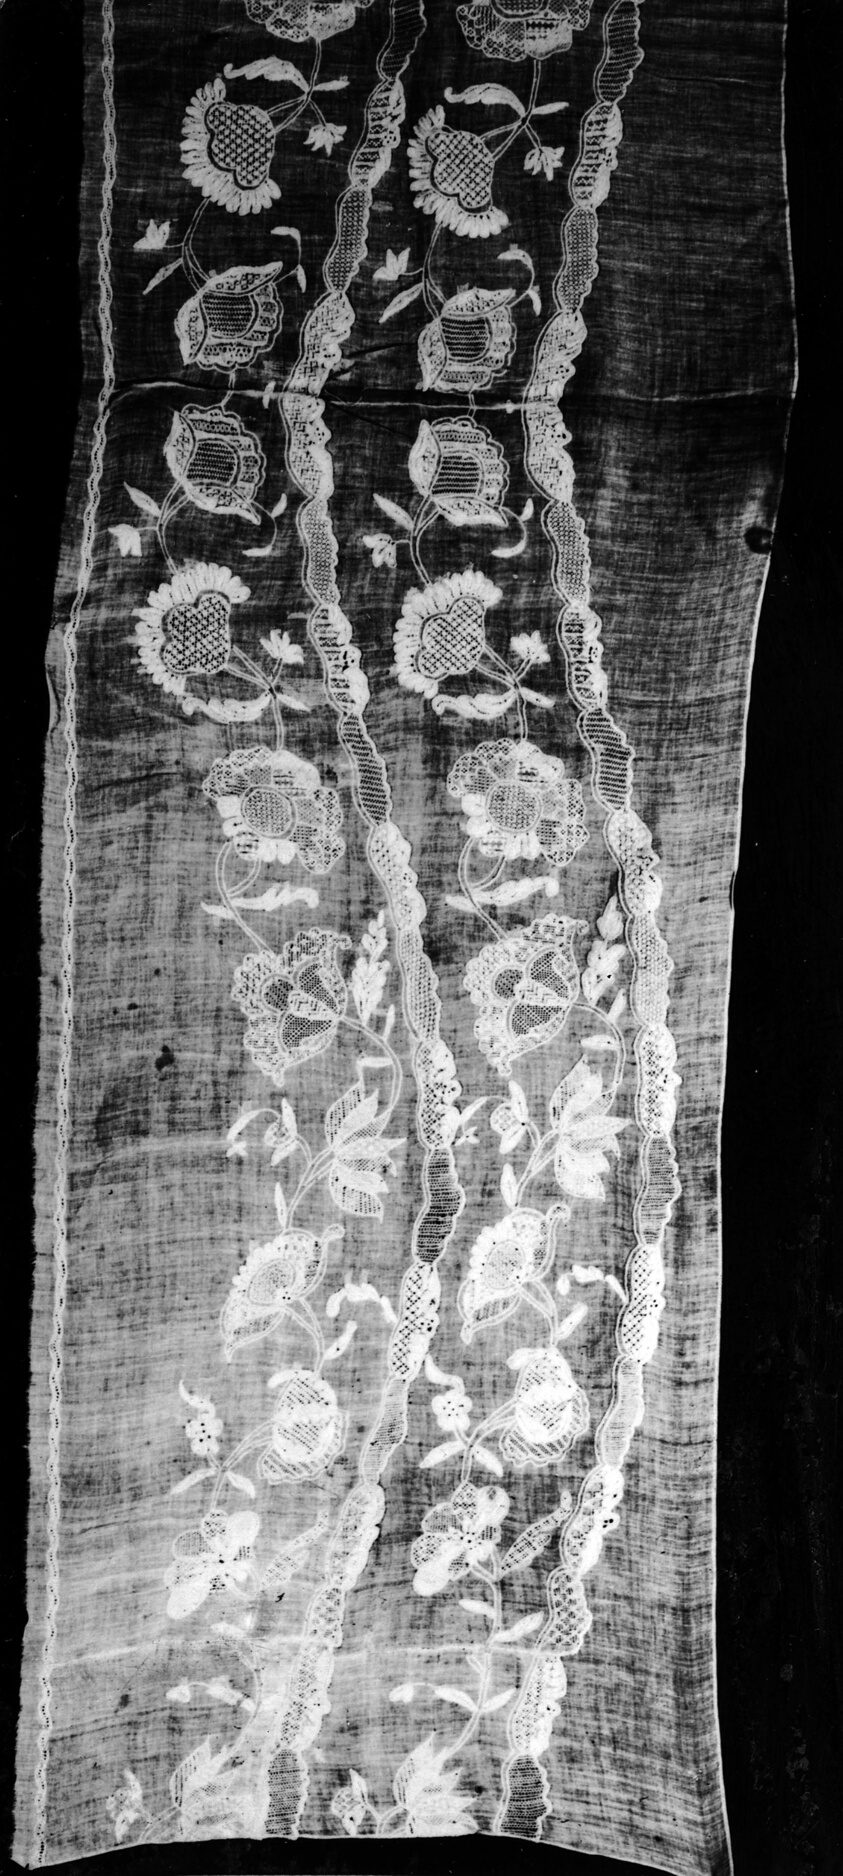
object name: Costume and Accessories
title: Sleeve Ruffles (Uncut)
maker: France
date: 19th century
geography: France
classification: costume accessory; needlework (visual works); costume; dress (garment); clothing; textile